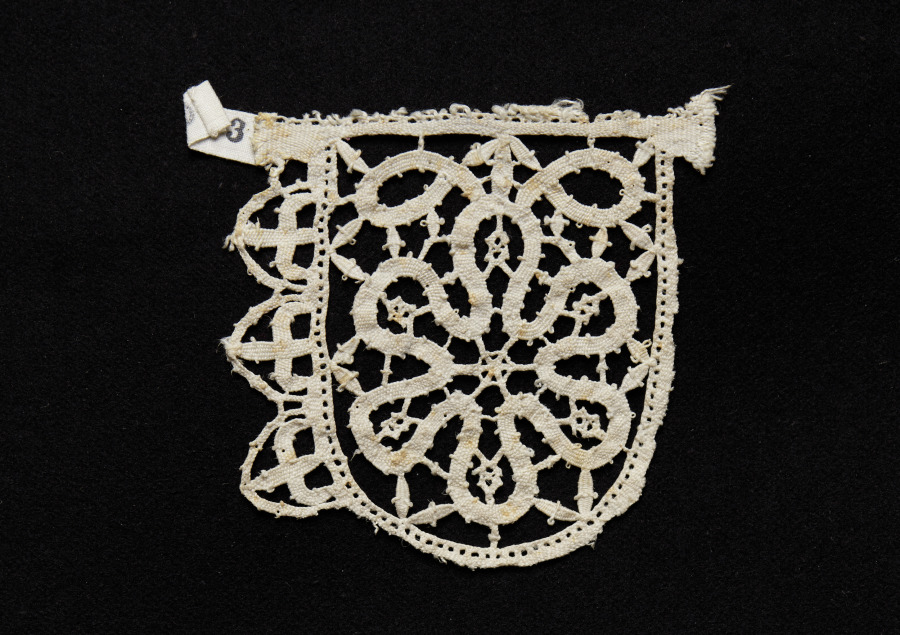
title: Lace Point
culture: Italy, Genoa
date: 1550–99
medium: Bobbin lace (needle lace, punto in aria design)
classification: Lace